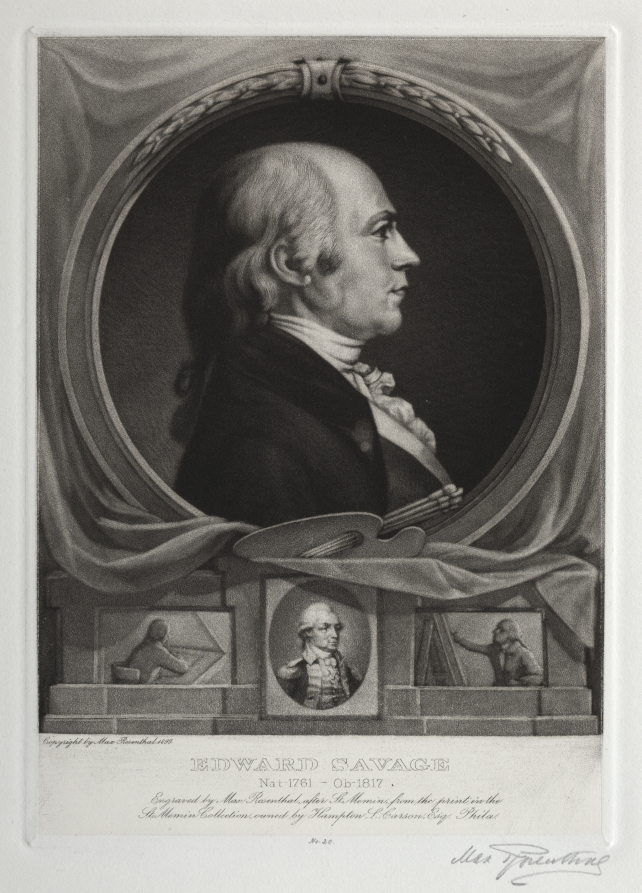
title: Edward Savage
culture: America, late 19th Century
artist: Max Rosenthal (American, 1833–1918)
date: 1899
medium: mezzotint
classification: Print